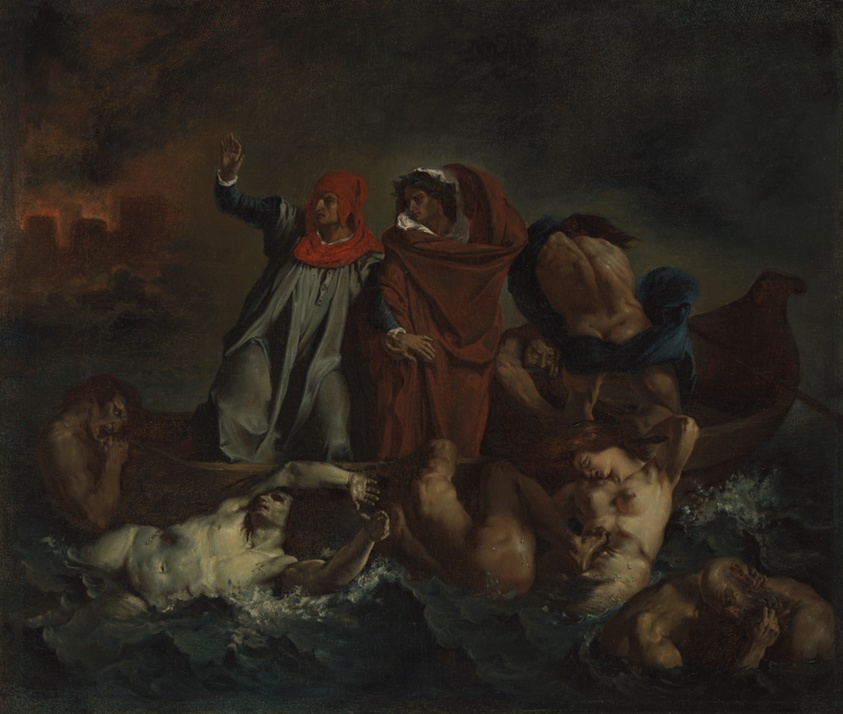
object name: Painting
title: Dante's Bark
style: 19th century, nineteenth century, romantic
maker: After Eugène Delacroix (French, 1798–1863)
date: c. 1840–60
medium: Oil on canvas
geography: France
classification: painting; oil paintings (visual works); paint; france; french; oil on canvas; european painting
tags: travel, boatman, boats, cities, death, France, French, Greek, Greek mythology, men, poetry, smoke, storms, water, wind, Century of Progress, world's fairs, Chicago World's Fairs